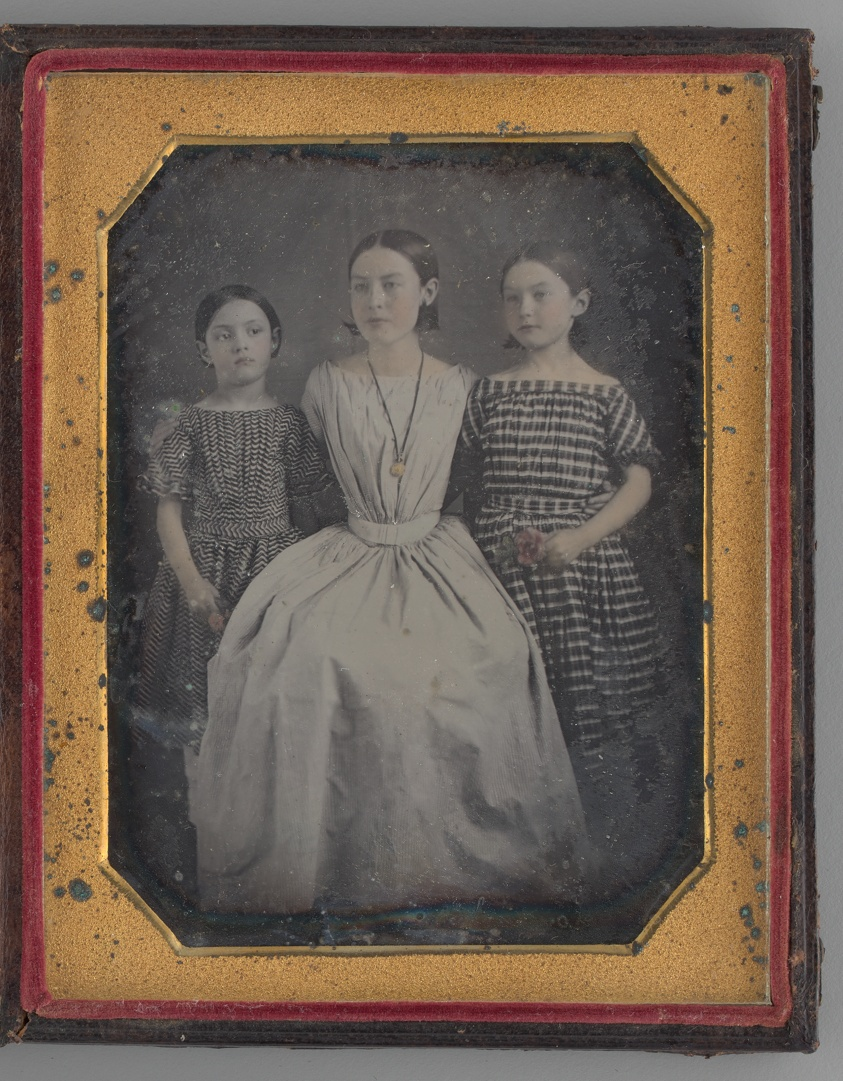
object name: Photograph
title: Untitled (Portrait of a Woman with Two Girls)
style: 19th century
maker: Unknown maker; American, 19th century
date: 1846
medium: Daguerreotype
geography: United States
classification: portrait; photograph; photographic process; photography; portrait; daguerreotype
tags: lundberg collection, portrait, girls, females, portraits, portraits: child subject, portraits: female subject